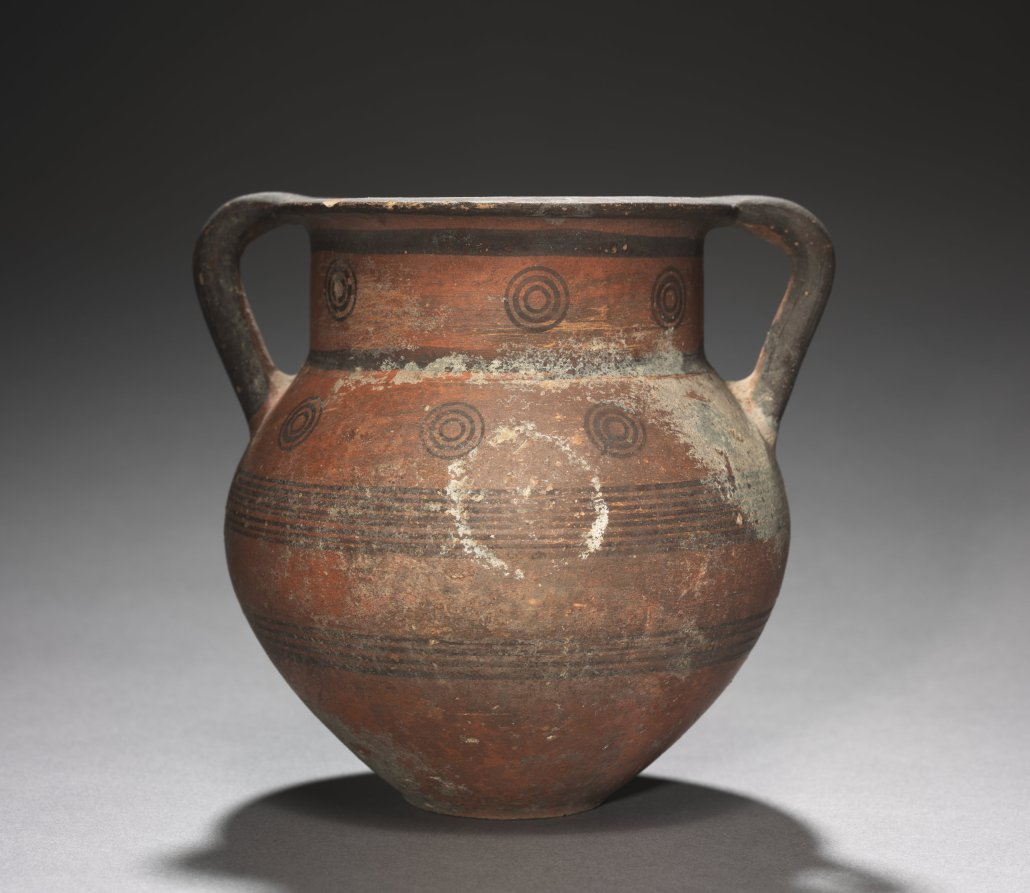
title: Amphora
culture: Cyprus, Cypro-Archaic I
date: c. 750–600 BCE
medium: red ware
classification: Ceramic